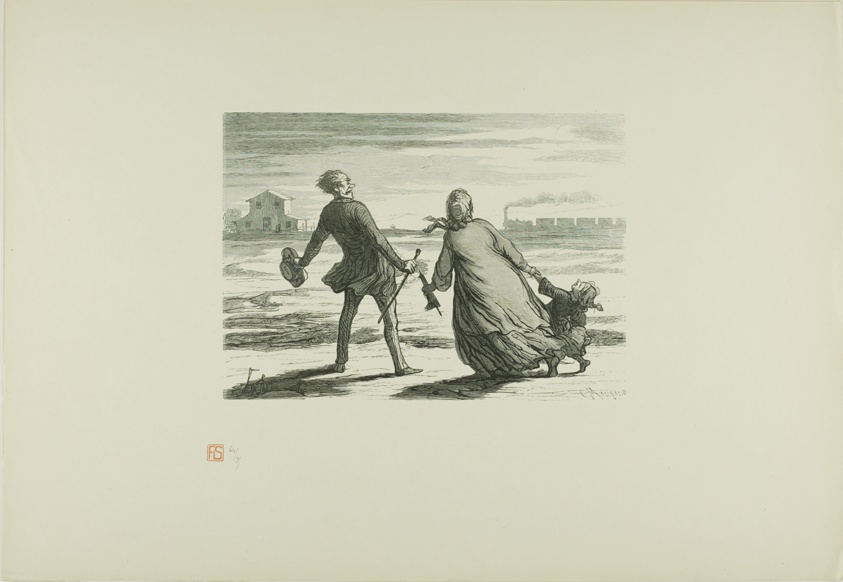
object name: Print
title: Too Late!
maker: Charles Maurand (French, 1824-1904); after Honoré Victorin Daumier (French, 1808-1879); printed by François Louis Schmied (Swiss, 1873-1941); published by Jules Meynial (French, 20th century)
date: 1862, printed 1920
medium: Wood engraving on cream Japanese paper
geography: France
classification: wood engraving; print; prints and drawing